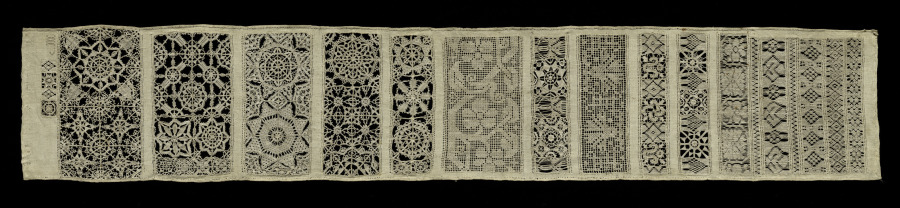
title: Lace Sampler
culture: England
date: 1600s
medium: Linen: needle lace (reticella, drawnwork, and cutwork)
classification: Sampler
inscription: "M - P" in eyelet stitch at bottom ("P" not completed).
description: This sampler has the maker's initials, M. P., worked in eyelet stitch, at the bottom. The letter "P" is incomplete.